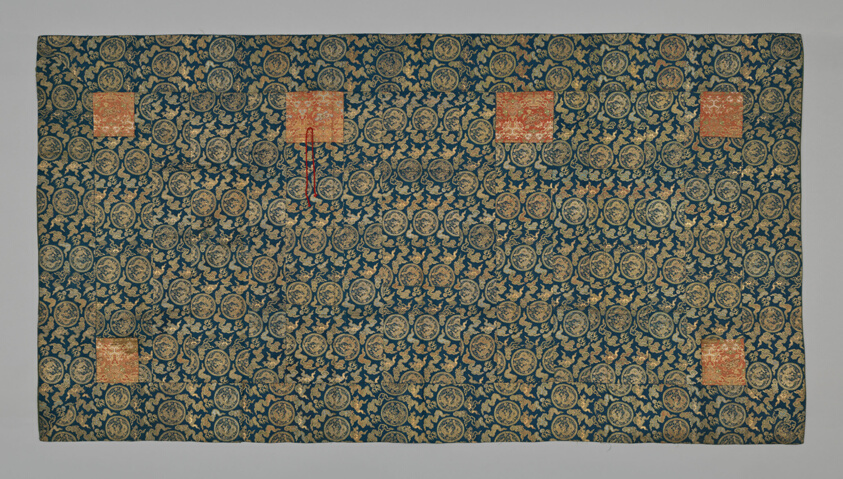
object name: Textile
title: Kesa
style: edo (japanese period)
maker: Japan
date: Edo period (1615–1868), late 18th century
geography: Japan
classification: textile; costume; liturgical - buddhist; weaving